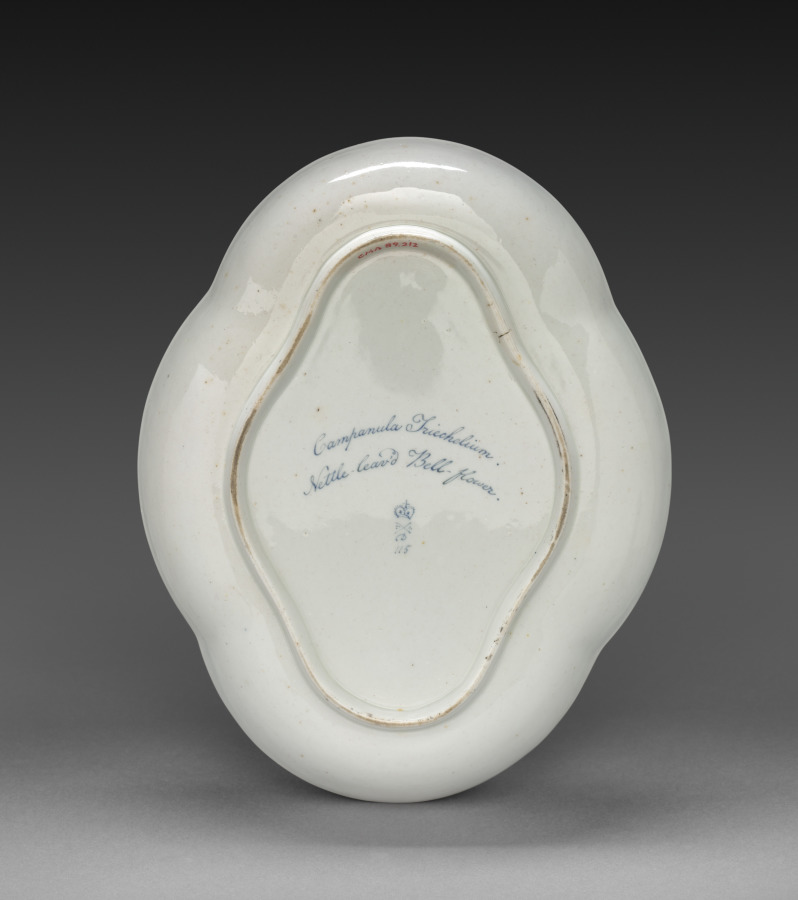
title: Quatrelobed Dish from Dessert Service: Nettle-leaved Bell Flower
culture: England, Derby, 18th century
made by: Derby (Crown Derby Period) (British)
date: c. 1800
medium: porcelain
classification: Ceramic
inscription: inscribed in blue on back: Campanula Triechelium./Nettle-leavid Bell-flower./crown/crossed batons and dots/D/115.